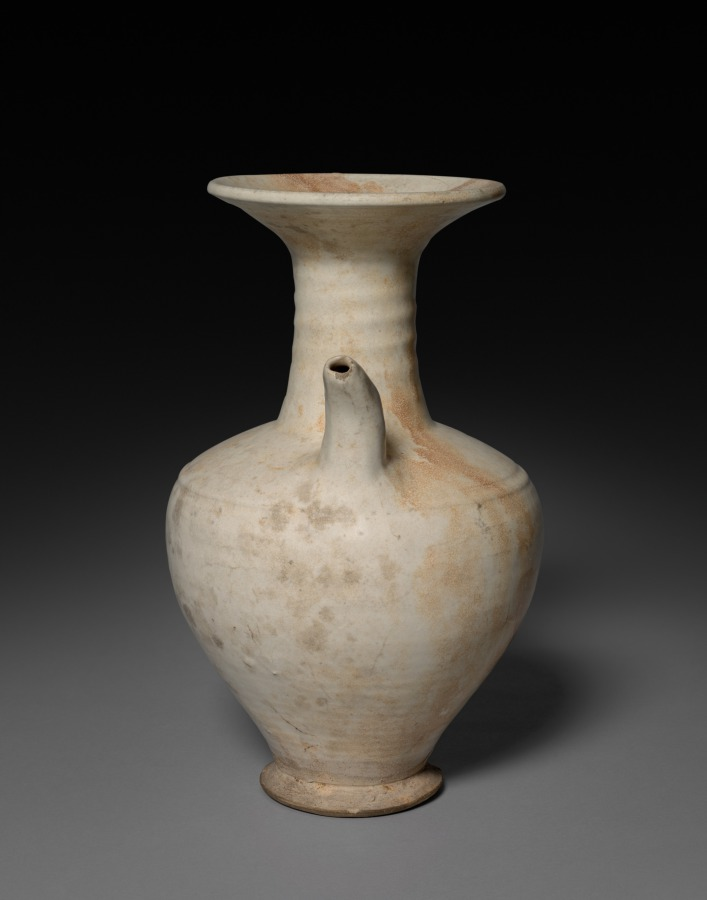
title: Ewer: Cizhou ware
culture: China, Northern Song dynasty (960-1127)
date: 1105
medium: buff stoneware with underglaze slip coating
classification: Ceramic